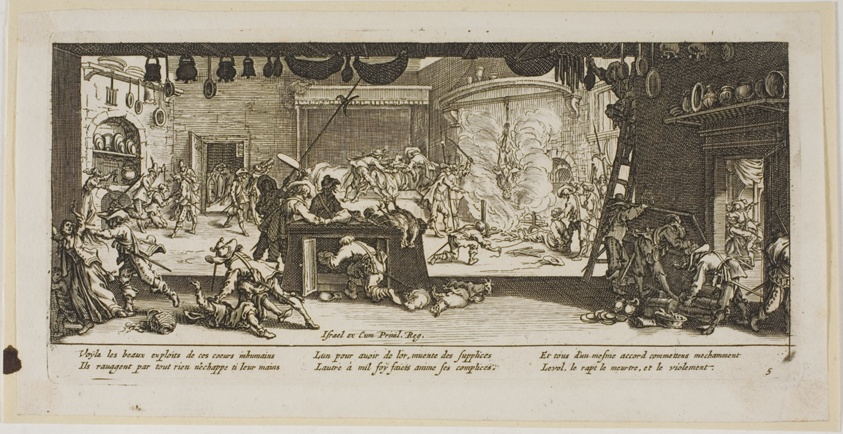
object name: Print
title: Plundering a Large Farmhouse, plate five from The Large Miseries of War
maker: Gerrit Lucasz van Schagen (Dutch, born 1642); after Jacques Callot (French, 1592-1635)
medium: Etching on paper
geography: Netherlands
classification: etching; print; prints and drawing